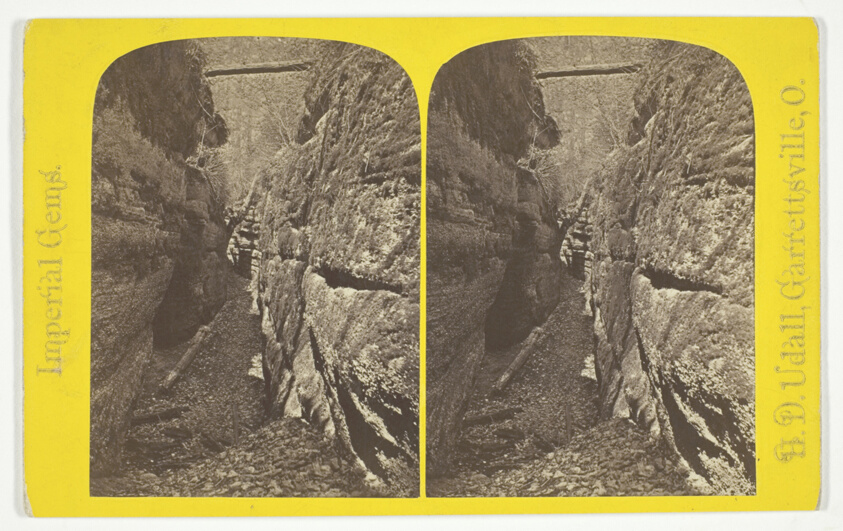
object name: Photograph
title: Entrance to Natural Bridge, No. 16 from the series "Imperial Gems"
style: 19th century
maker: H. D. Udall; American, active late 19th century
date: 1875/99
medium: Albumen print, stereo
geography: Ohio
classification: photography; photograph